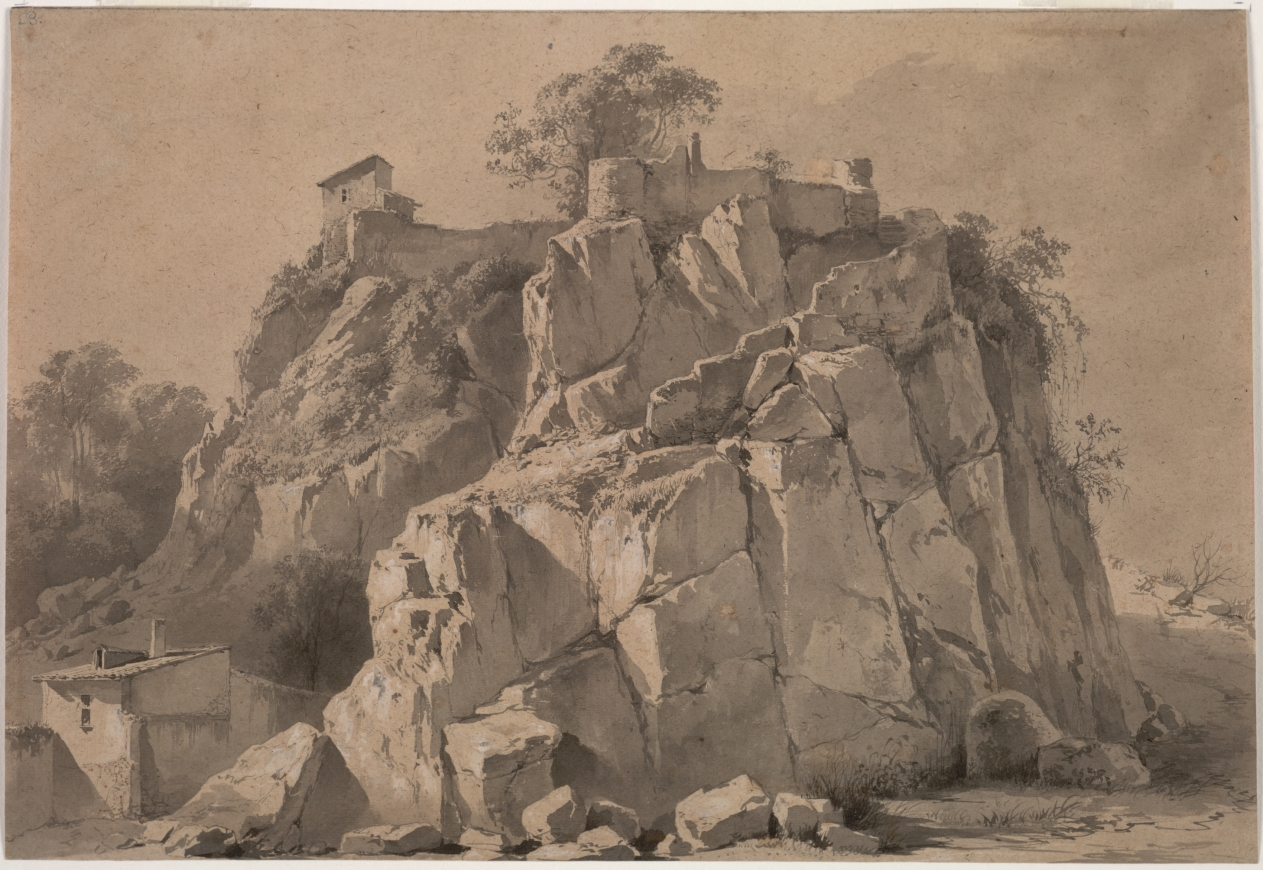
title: The Rock of Beauregard, Lyon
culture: France, 18th century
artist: Jean Jacques de Boissieu (French, 1736–1810)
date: 1780–1790(?)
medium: gray wash with graphite, heightened with white gouache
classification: Drawing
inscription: Signed with initials D.B., upper left corner